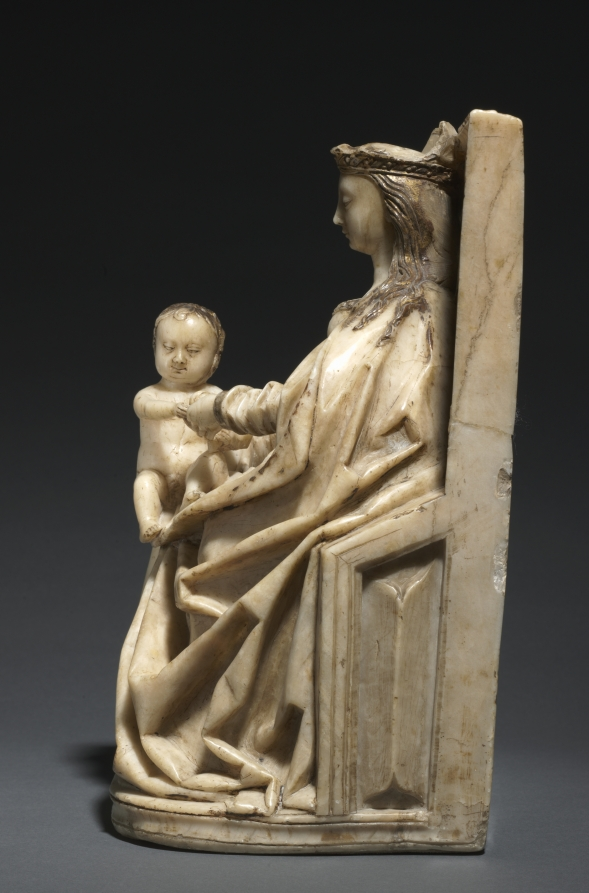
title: Enthroned Virgin and Child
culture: Spain, Burgos, 15th century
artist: Gil de Siloé (Spanish, active c. 1475–1505)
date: c. 1480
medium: alabaster with traces of gilding and polychromy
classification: Sculpture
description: The seated Virgin Mary with Christ is one of the most popular themes in Christian art of the Middle Ages. Alabaster was an ideal material to depict the fleshiness of Jesus, the lush folds of Mary’s cloak, and the fine details of the throne and gown. Christ is reaching for something in his mother’s hand that is now unrecognizable because alabaster tends to break or wear away quickly. It may have been a book or a piece of fruit. Given its small size, it is likely that this sculpture was intended for private use.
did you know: This sculpture was possibly made for Queen Isabella, the Spanish ruler who sponsored Christopher Columbus.